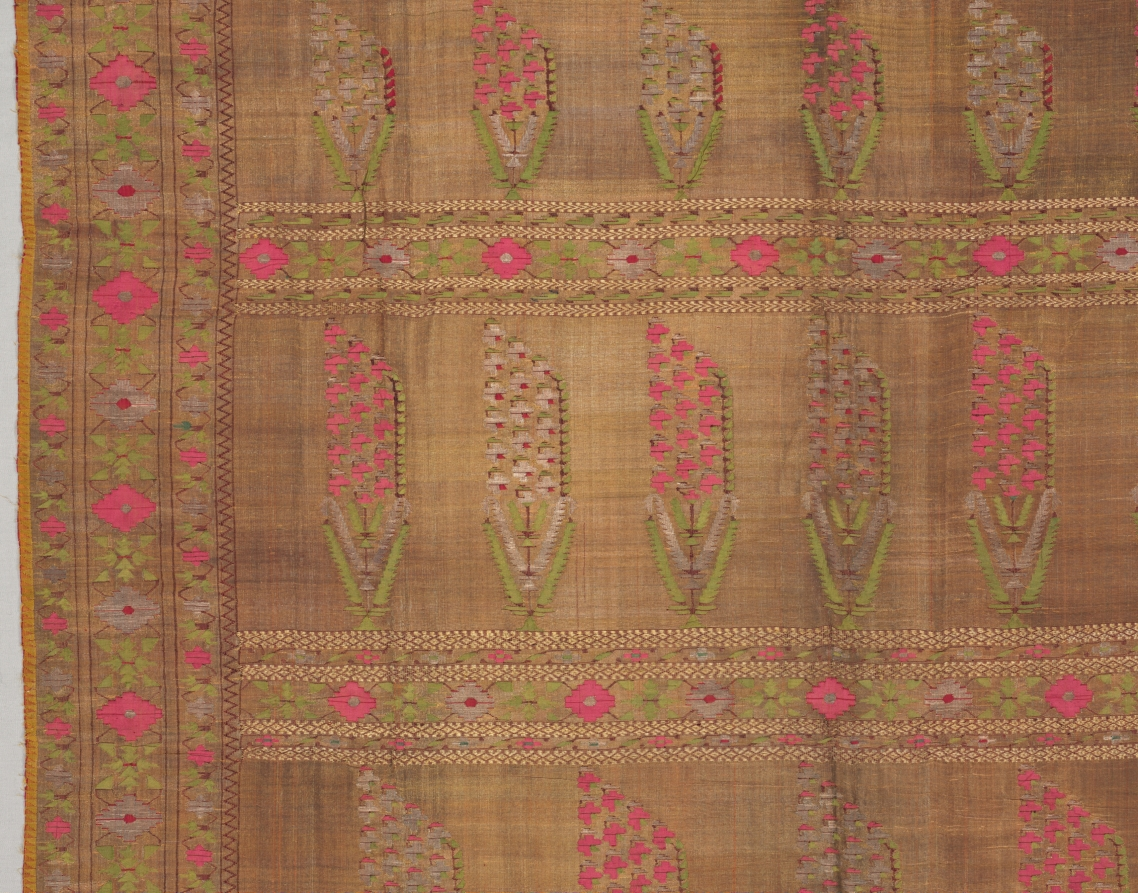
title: Fragment of a Sari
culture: India, Aurangabad ?, 18th-19th century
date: 1700s - 1800s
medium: brocade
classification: Textile